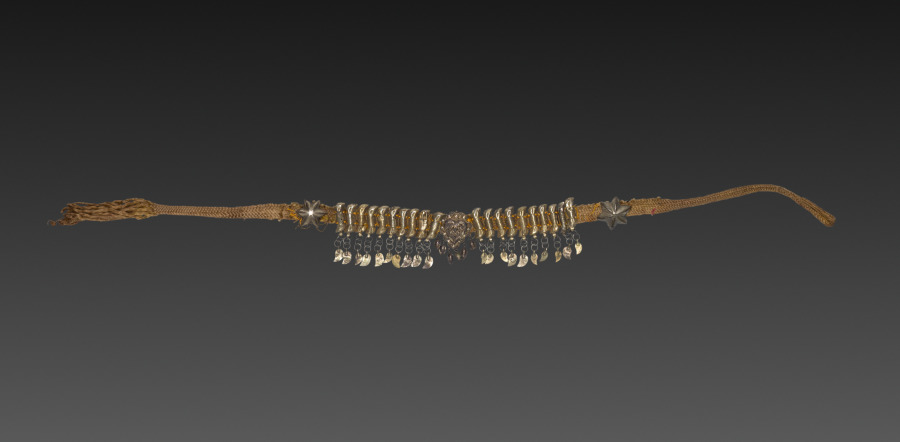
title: Armlet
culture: Silesia, 19th century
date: 1800s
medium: silver gilt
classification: Jewelry